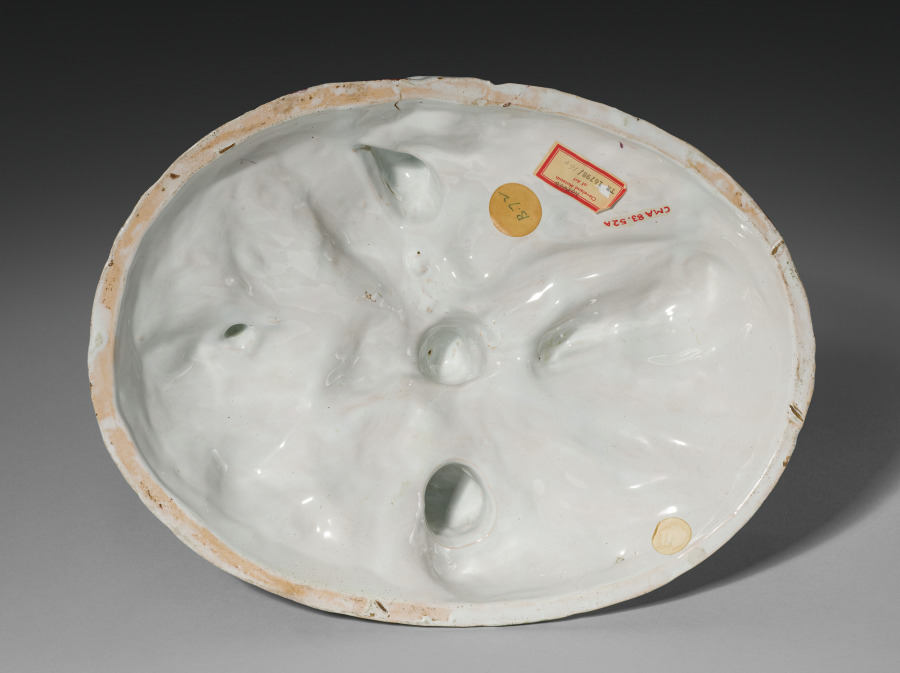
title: Cover for a Tureen in the Form of a Basket of Game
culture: France, 18th century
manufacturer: Sceaux Factory (French, active 1748–66)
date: c. 1755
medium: Tin- glazed earthenware (faience) wth enamel decoration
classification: Ceramic